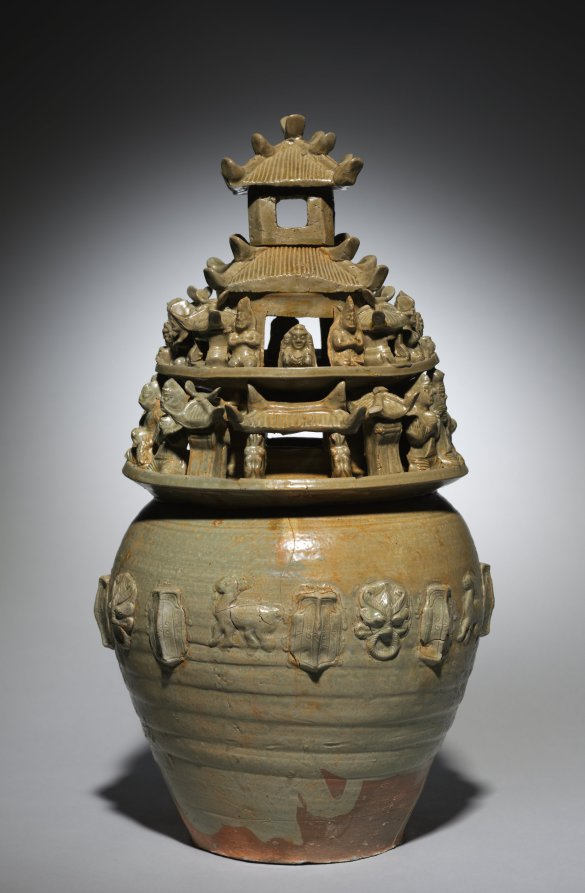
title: Funerary Urn (Hunping)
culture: China, Western Jin dynasty (265–316 CE)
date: late 200s CE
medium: green-glazed stoneware with molded and sculpted decoration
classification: Ceramic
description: Green-glazed stoneware developed greater variety in the south after the Han dynasty. Large funerary urns known as hunping, or "the urn of the soul," are evidence for its prolific production. This type of urn features multistoried towers populated by human figures, animals, and birds. It was likely associated with the southern funerary tradition of "summons of the soul." The wandering soul of the deceased was summoned to return. The urn with architectural designs (sometimes with grains placed inside) provided a safe place of refuge.